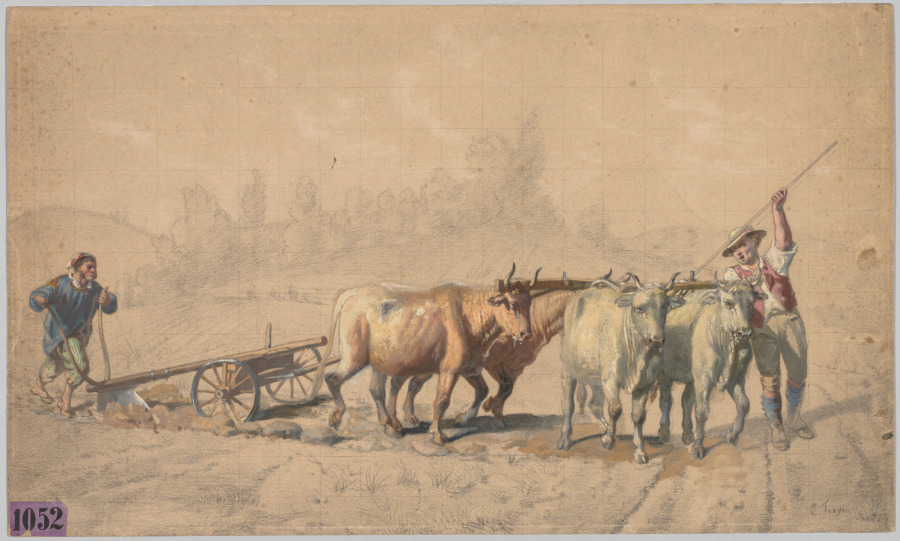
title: Four Oxen Pulling a Plough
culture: France, 19th century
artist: Constant Troyon (French, 1810–1865)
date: 1853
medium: Black chalk and gouache with graphite and gum Arabic and traces of white chalk in sky, squared for transfer in black chalk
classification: Drawing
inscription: Inscribed, lower right, in black chalk: C. Troyon / Paris 1853 Inscribed on verso, top edge, in graphite: Samlung Prof. Adam Politzer Wient / [in another hand] Constant Troyon / Studie zum grossen Bilde in Louvre 1839 / Feldarbeit Salon label, lower right, black ink on purple: 1052 Stamp, verso, purple ink: [in double-circle] BUNDDENKMALMAN WIEN [Austrian Federal Monuments Office]